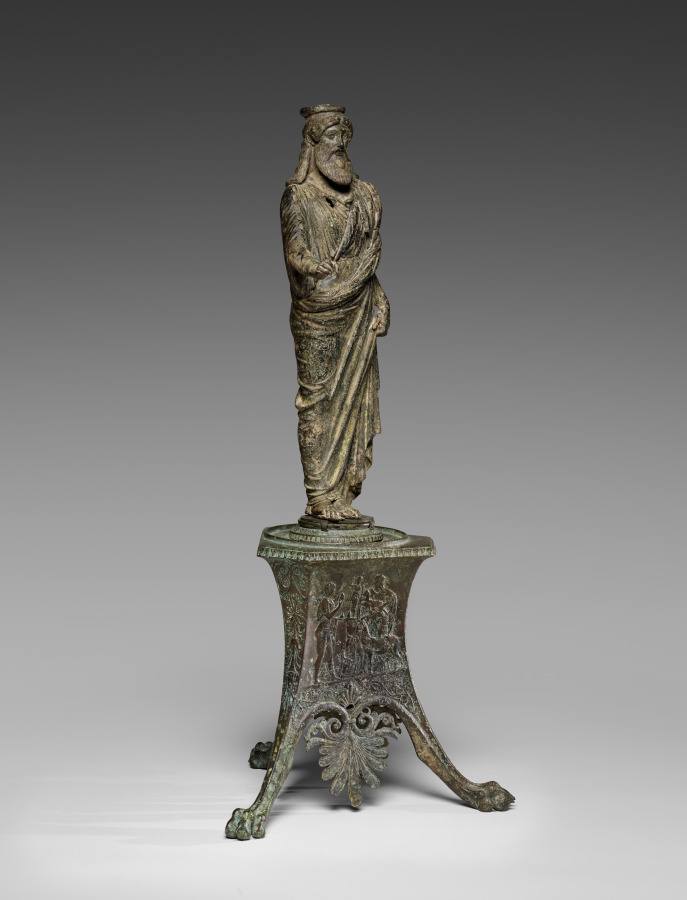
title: Statuette of Dionysos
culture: Italy, Roman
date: 50 BCE–50 CE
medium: bronze and silver and traces of gilding, hollow cast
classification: Sculpture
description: This bronze figure of Dionysos, the god of wine, theater, and the mysteries, is presented in a style recalling Archaic Greek art, most noticeably in his stiff pose and trimmed beard. The more naturalistic folds of his garment speak to a later date, in the Roman period. The disk attached at the top of the head suggests that this figure was once part of an ornate piece of furniture, perhaps a stand or support. In his right hand, the god likely held a kantharos or other attribute. He would have been further embellished with inlaid copper (lips), silver (whites of eyes), and perhaps gilding (garment).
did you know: Over his long, thin garment, Dionysos wears an animal skin, fastened on his left shoulder.